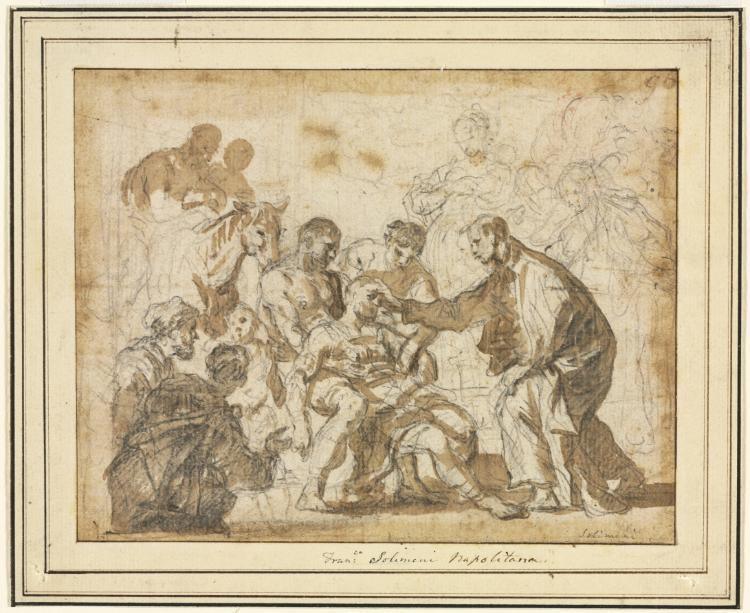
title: A Miracle of Saint Maurus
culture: Italy, 18th century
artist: Francesco Solimena (Italian, 1657–1747)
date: 1697–1708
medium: black chalk and brown wash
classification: Drawing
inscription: Lower right, in black chalk: "Solimeni" in black ink on the mount: "Fran.co Solimeni Napolitano"